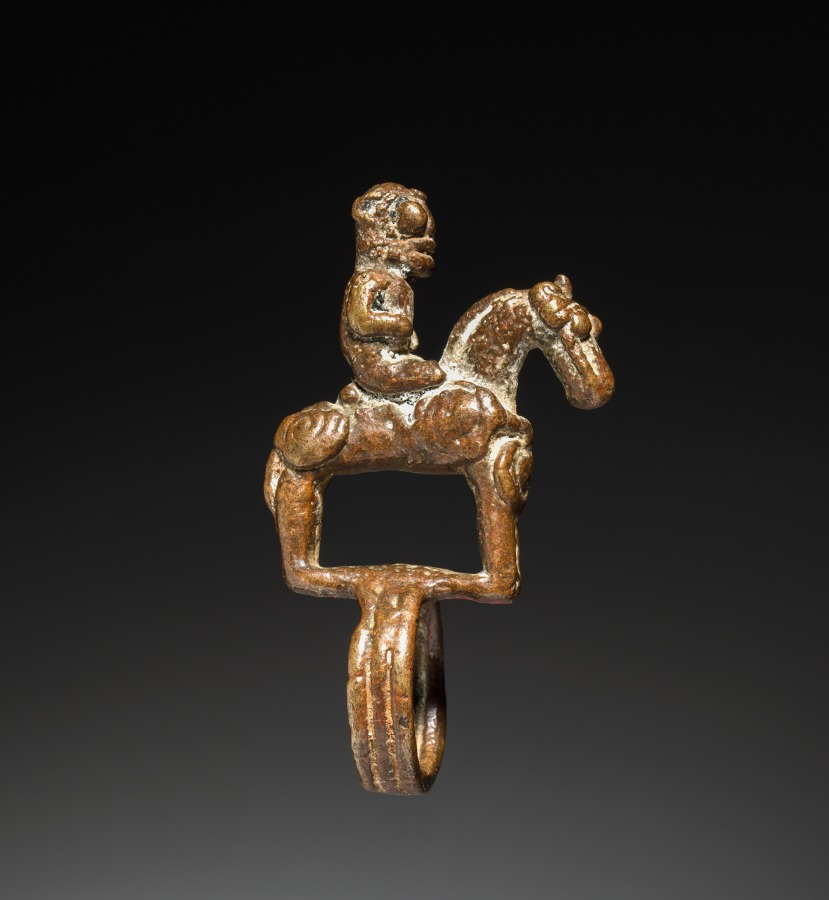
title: Ring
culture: Africa, West Africa, Mali, Dogon-style maker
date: before 1975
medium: Copper alloy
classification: Jewelry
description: This ring may have belonged to a Hogon, the highest religious dignitary in a Dogon community, who wore it among the many insignia of his status. The horse is a kind of moving throne, indicating the physical and symbolic power of its rider, who is placed physically in space above others. While it is difficult to make out details on the rider, the horse is well-equipped with a bridle and saddle. The circular shapes at the front and back of the animal's sides may represent shields. To make this ring, a smith first modeled it in wax. The wax was covered in clay and melted out when baked, leaving behind a mold to pour liquid metal into.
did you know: Horses were known in the region of present-day Mali from early eras, recorded in the accounts of the Arab traveler Ibn Battuta in 1352, and in the Malian epic Soundiata, where riders on horseback masterfully used lances and swords